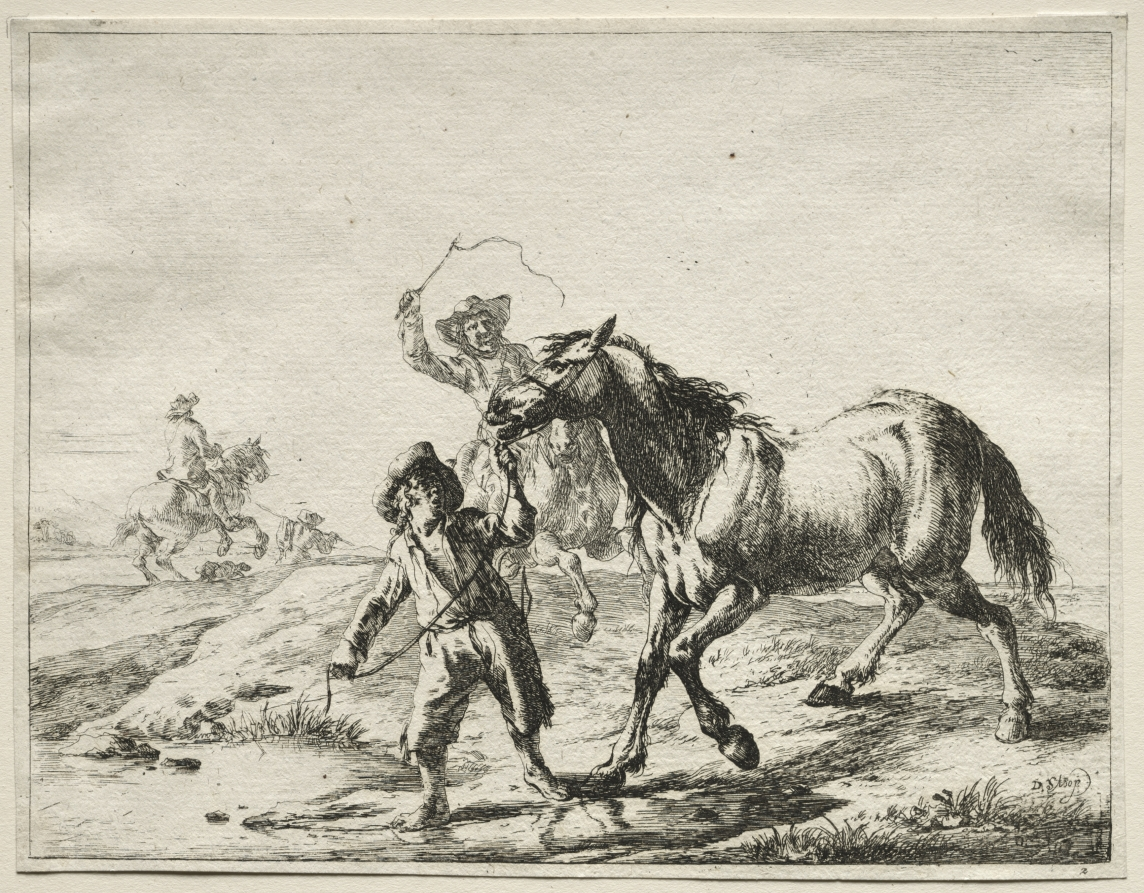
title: A boy taking a horse to drink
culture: Netherlands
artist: Dirck Stoop (Dutch, c. 1618–1681)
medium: etching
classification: Print